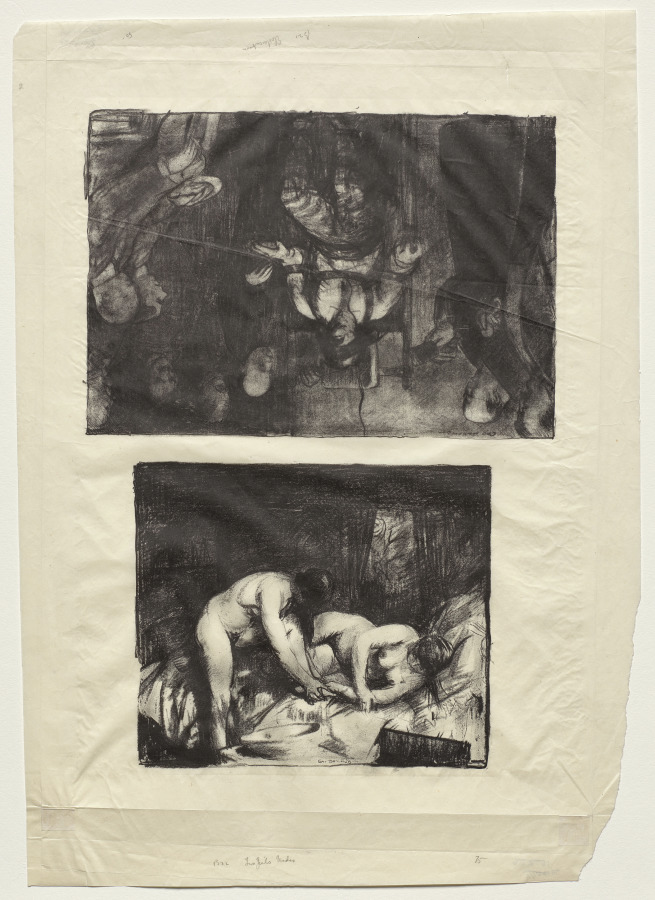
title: Two Girls, first state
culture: America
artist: George Bellows (American, 1882–1925)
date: 1917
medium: lithograph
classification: Print